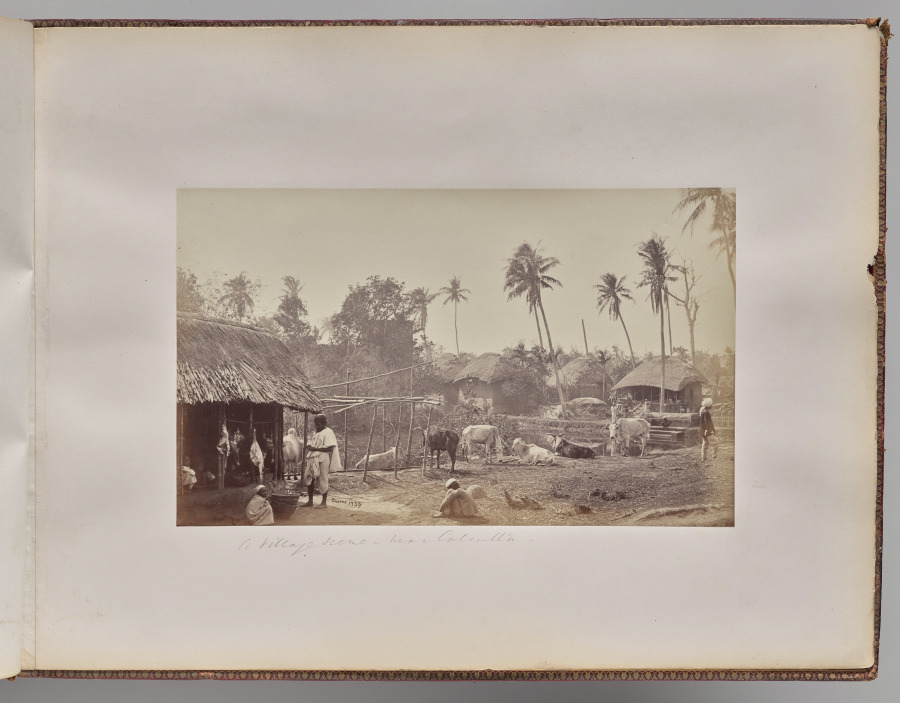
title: A Village Scene, Near Calcutta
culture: England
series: Photographs of Northern India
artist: Samuel Bourne (British, 1834–1912)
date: 1863–70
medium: albumen print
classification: Photograph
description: The 50 images in this album, all taken in the 1860s, move from the hill towns of the Himalayas down to cities including Lahore (now in Pakistan), Delhi, Lucknow, Agra, Benares (now Varansi), and Calcutta (now Kolkata). Architectural studies of major monuments offer valuable historical records of what sites such as the Taj Mahal and the imperial mosque of the Mughal emperors in Delhi looked like before twentieth-century restorations.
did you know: Samuel Bourne, the author of most the images in this album, was a banker in England before he moved to India to become a professional photographer.